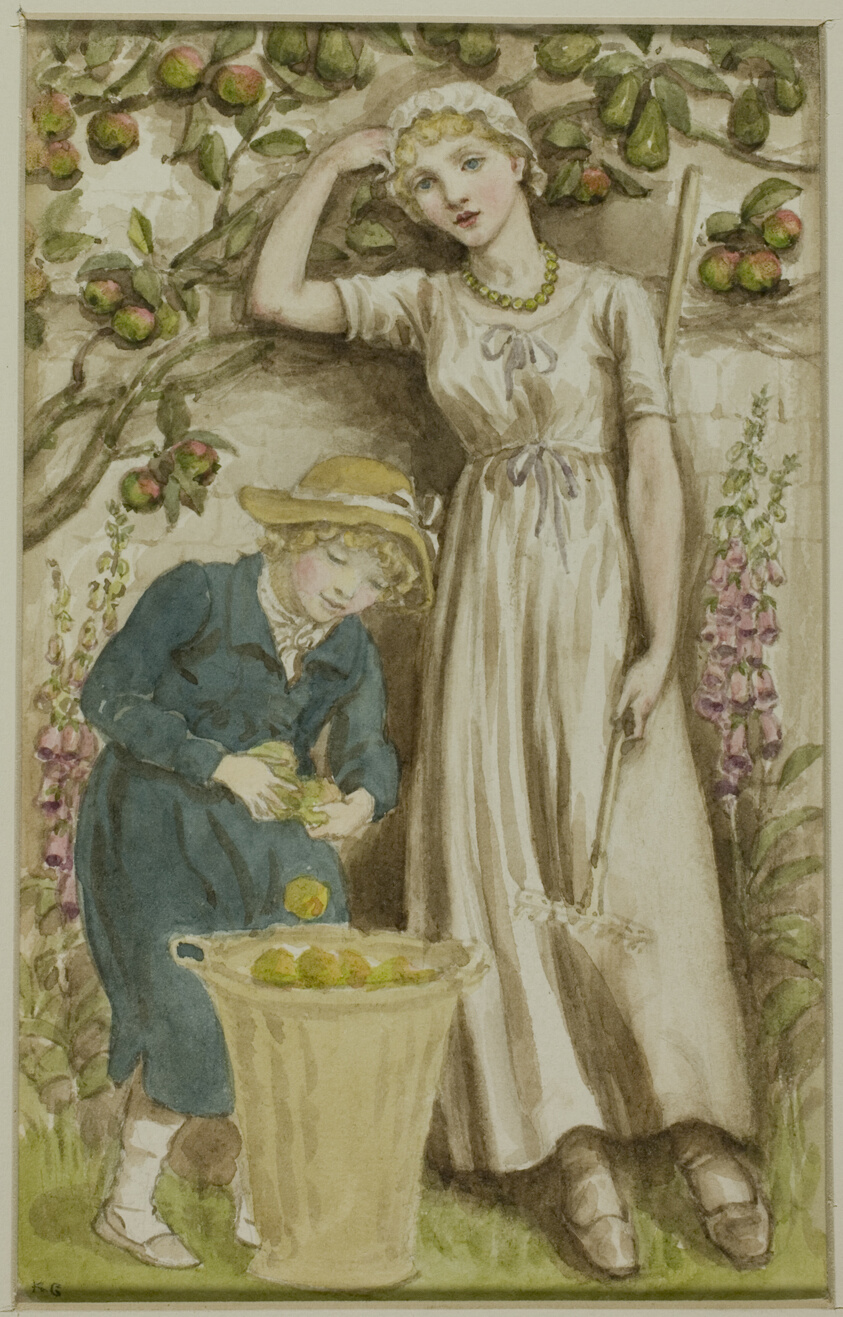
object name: Drawing and Watercolor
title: Girl and Boy Picking Apples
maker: Kate Greenaway (English, 1846-1901)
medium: Watercolor, over touches of graphite, on cream wove paper, laid down on wood-pulp board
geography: England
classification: watercolor; drawings (visual works); prints and drawing